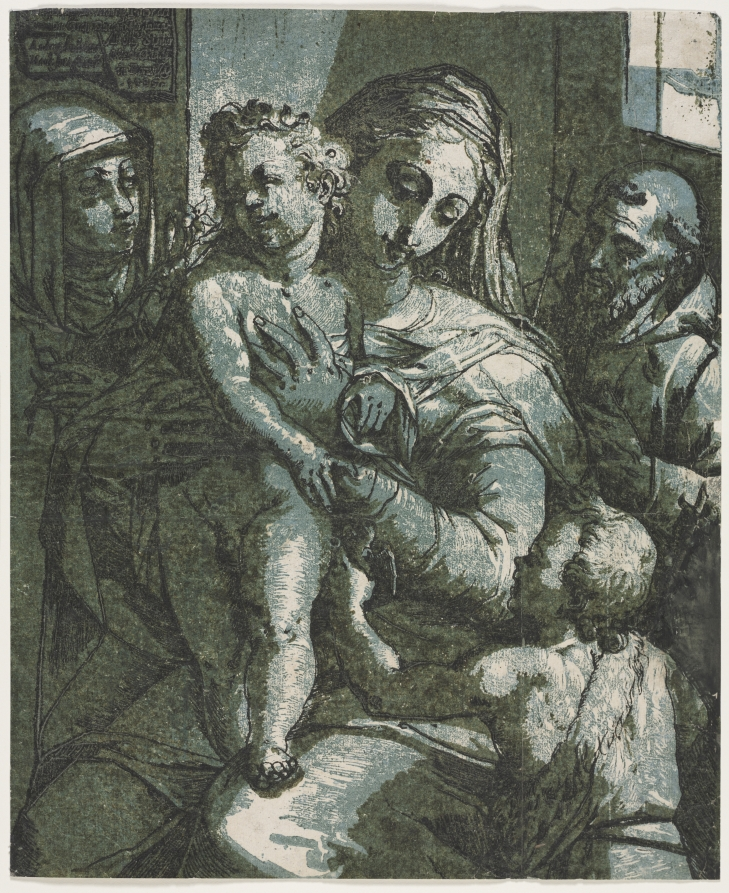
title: Virgin and Child with St. John, St. Catherine of Siena and Saint Francis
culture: Italy, 16th century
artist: Andrea Andreani (Italian, about 1558–1610)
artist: after Jacopo Ligozzi (Italian, 1547–1626)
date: 1585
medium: chiaroscuro woodcut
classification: Print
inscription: Lettered upper left: (J)acopo Ligozio Veronese Pittor' del / (Se) reniss Gran Duca di Tosc Inven / (A) ndrea Andriano / (M)ant.o. Intagliator.e / All Ill.o Signor / Nicolo Gaddi / in Fiorenza / ° 1585°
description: Printed from four blocks in light blue, green, and black, this chiaroscuro woodcut shows the Virgin and Child flanked by the infant St. John the Baptist and St. Francis at right. St. Catherine of Siena takes a place on the left and holds a flower.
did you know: The CMA owns another version of this chiaroscuro woodcut, which differs in the color of the ink used to print it (1960.19).